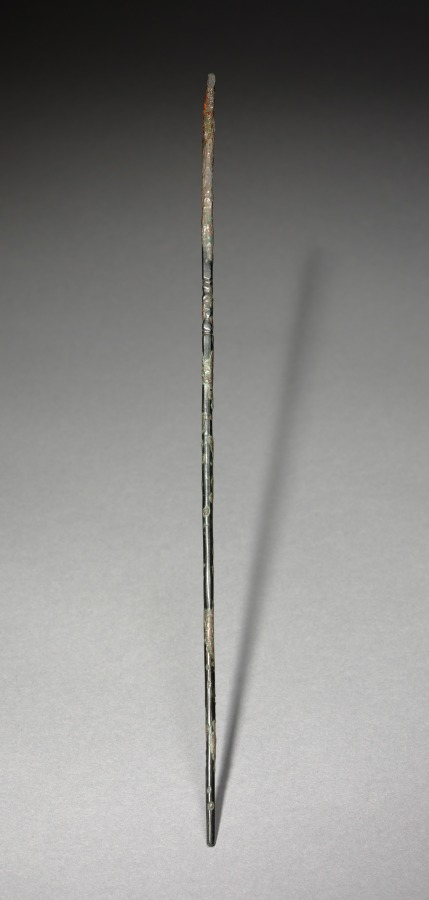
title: A Pair of Chopsticks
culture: Korea, Goryeo dynasty (918–1392)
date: 918–1392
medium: bronze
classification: Metalwork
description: In Korea, chopsticks made of metal such as brass, silver, and gold were excavated from ancient tombs and ruins dated to the 6th century at the earliest. Burial goods often include utilitarian objects such as table wares and utensils because the dead were believed to need them in the afterlife.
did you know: In contrast to the Chinese and Japanese, Koreans still prefer metal chopsticks (stainless steel and brass) to wooden ones.